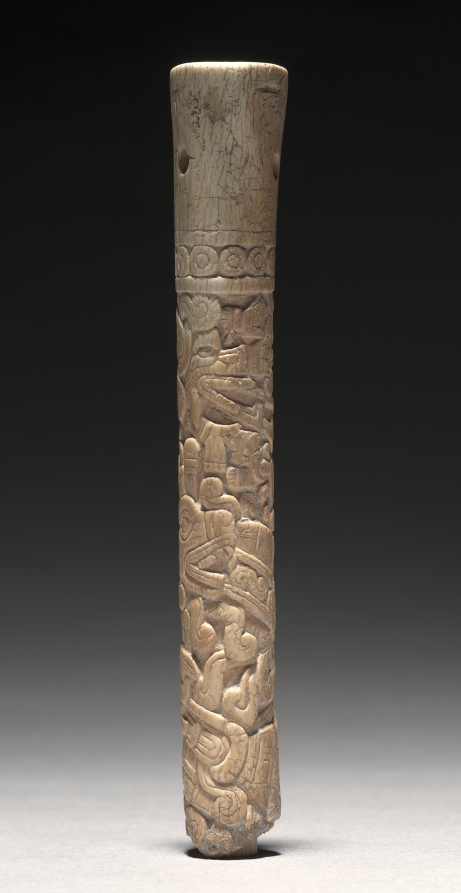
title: Carved Tube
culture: Mexico, Oaxaca, Mixtec, 13th-16th century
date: c. 1200–1519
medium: bone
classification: Jewelry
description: Carved in spiral registers, the ornamentation on this bone tube resembles Mixtec painting, both in codices (screenfold books) and architectural murals.